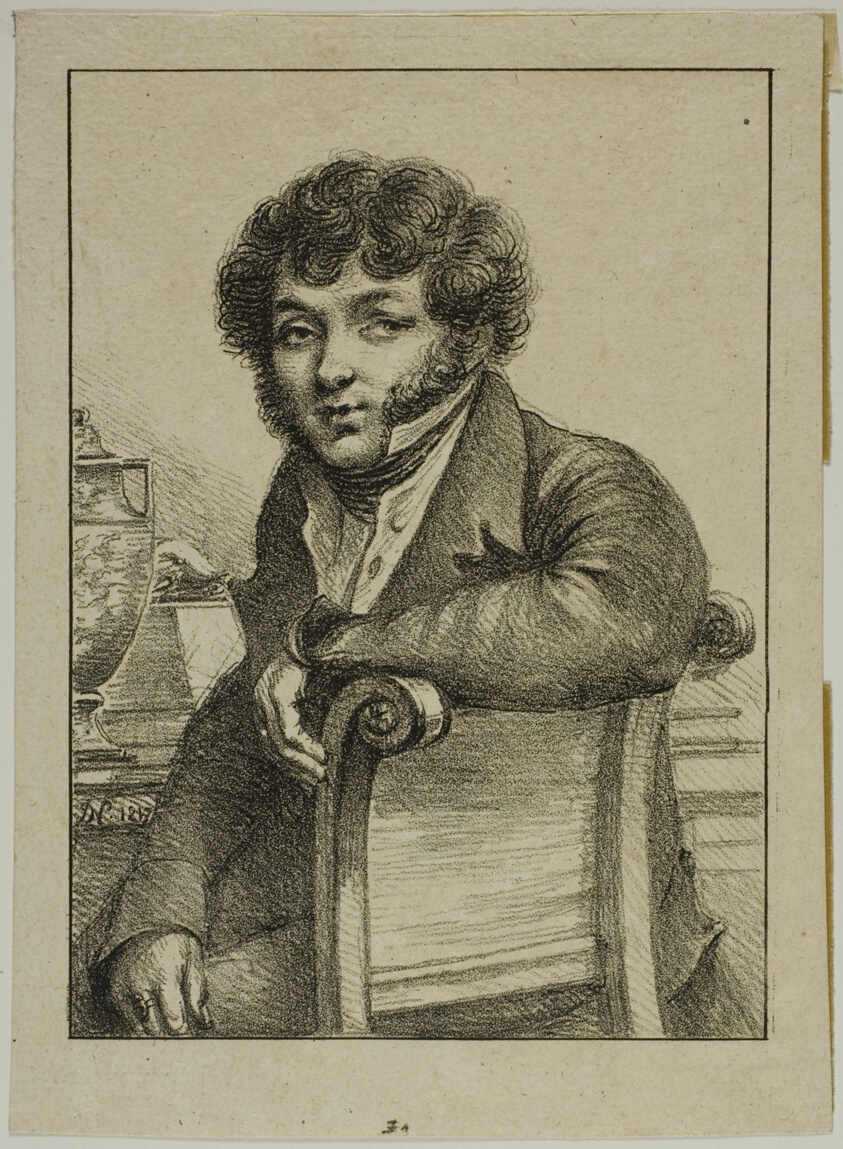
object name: Print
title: Portrait of Brunet, Printer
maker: Dominique-Vivant Denon (French, 1747-1825)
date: 1817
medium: Lithograph in black (pen and ink and crayon style) on cream laid paper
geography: France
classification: lithograph; print; prints and drawing